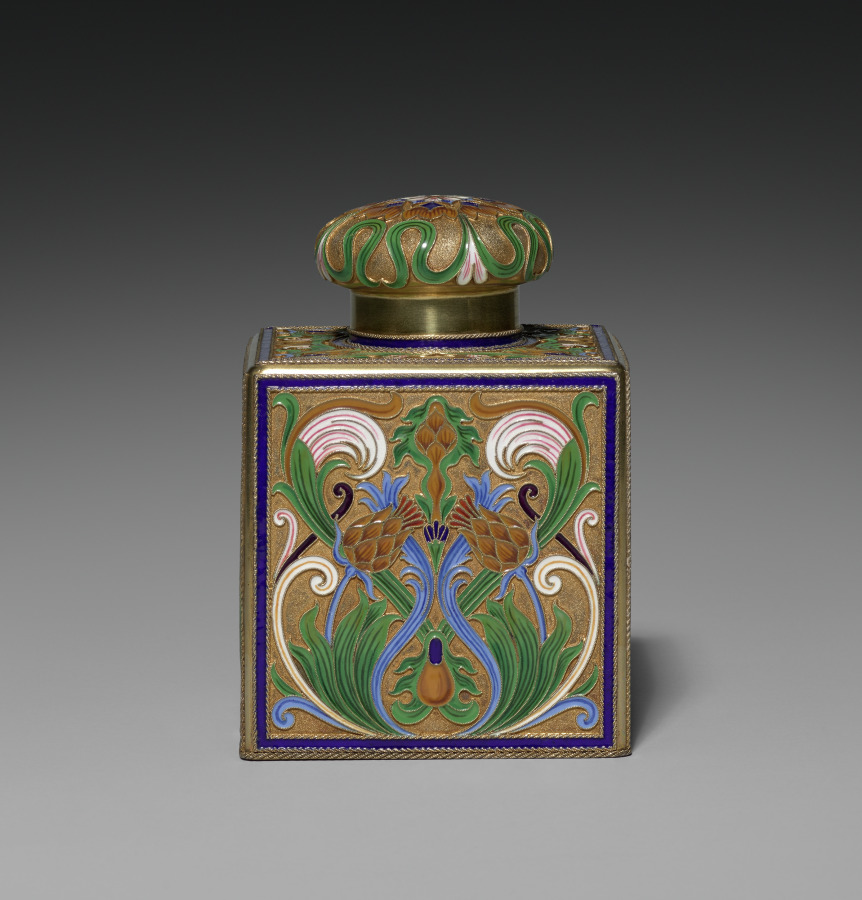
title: Covered Tea Caddy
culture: Russia, St. Petersburg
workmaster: attributed to Feodor Ivanovich Rückert (Russian, 1840–1917)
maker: House of Fabergé (Russian, 1842–1918)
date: 1896–1906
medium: silver gilt, opaque cloisonné enamel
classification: Miscellaneous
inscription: 88, Kokoshnik, tester's initials [assay mark for Moscow, 1899-1908]; C. Fabergé (in Cyrillic); double-headed eagle [imperial warrant]; 88.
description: Fabergé’s craftsmen in Moscow, especially under the watchful eye of workmaster Feodor Rückert, became known for their work in the pan-Slavic or neo-Russian style, hearkening back to 17th-century motifs of Russian folk art. Often on rather conventional shapes, Rückert and his silversmiths created an explosion of color, achieved through the historic technique of cloisonné enamel in which tiny metal lines are soldered to the surface then filled with glass powders in various colors and fired to create a high gloss finish. The result is a spectacular evocation of the 17th-century originals. Far from mere copies, however, Rückert's designs, such as this tea service, employ naturalistic or abstract motifs in a thoroughly modern adaptation of a remarkable earlier period of Russian art and decoration.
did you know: This covered tea caddy is part of a larger tea service.